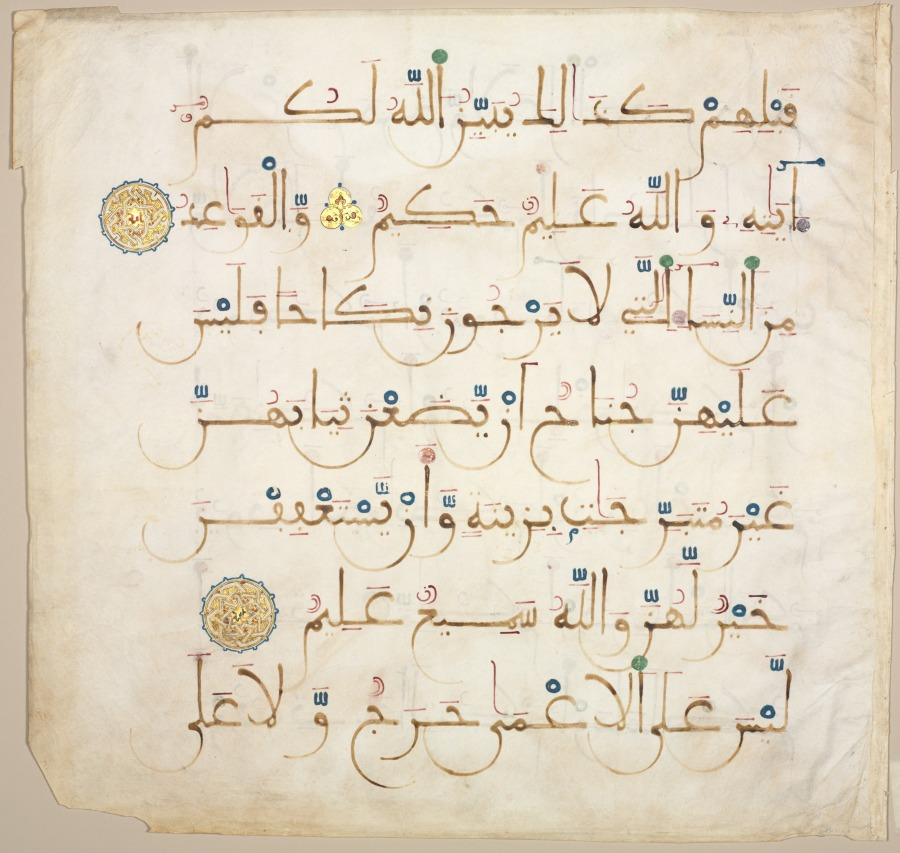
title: Qur'an Manuscript Folio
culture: Southern Spain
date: 1200s–1300s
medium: ink, gold, and color on parchment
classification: Manuscript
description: This page from the “Chapter of Light” (24:59–61) in the Qur'an is written in the monumental script of Islamic Spain and North Africa, known as Maghribi Kufic. Words flow rhythmically with curving flourishes toward the left margin where letters end in almost perfect semicircles, an elegant hallmark that contrasts with the upright shafts. Distinctive markings—vowels in red and diacritics in blue—identify the vocalization of the text, which would have been read or recited aloud to an assembly.